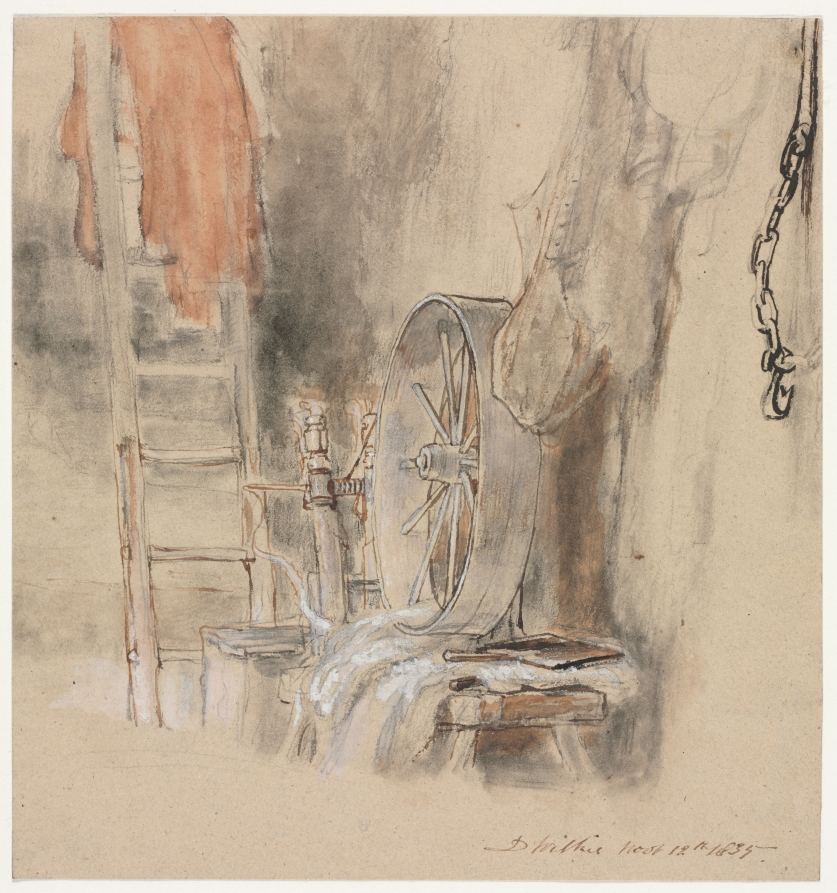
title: Study for "The Peep-O’-Day Boys’ Cabin, in the West of Ireland" ("The Sleeping Whiteboy")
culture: England, 19th century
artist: David Wilkie (British, 1785–1841)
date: 1835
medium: watercolor, point of brush, and gouache with graphite and brown ink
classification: Drawing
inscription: signed and dated, in brown ink, at lower right: DWilkie Novb 12th 1835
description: One of the greatest draftsmen of the British school, Sir David Wilkie painted slowly but drew prolifically, making studies upon which he relied to spur his imagination and compose his paintings. In this study for a painting exhibited at the Royal Academy in 1836, the artist worked out the details of a domestic interior. Here he depicted the corner of a cabin in Ireland where wool was processed: a pair of carders used to disentangle textile fibers and a spinning wheel rest upon a rough-hewn bench, and a swath of hand-dyed red cloth is flung over a ladder rung.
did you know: The painting to which this drawing relates was purchased by the prominent collector Robert Vernon and exhibited at the Royal Academy in 1836.